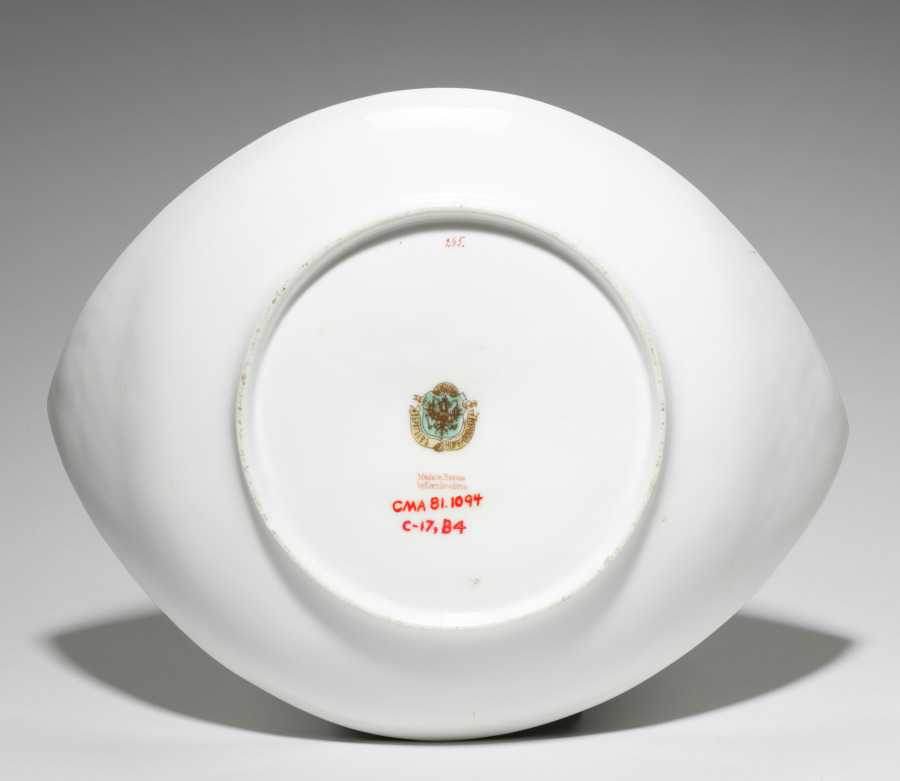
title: Bowl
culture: Russia, St. Petersburg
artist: Kornilov Brothers (Russian, established 1835)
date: between 1891–1917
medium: porcelain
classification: Ceramic